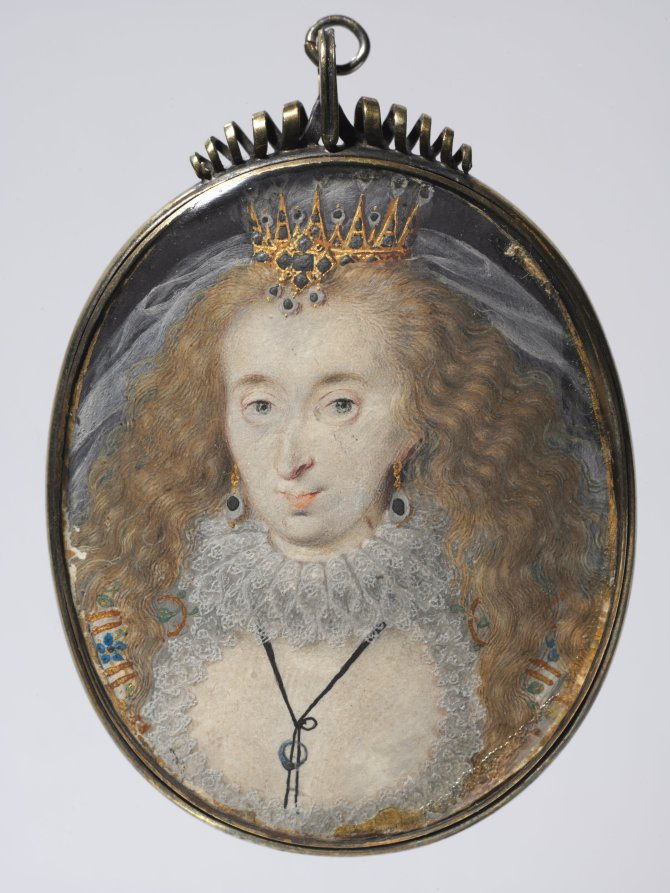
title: Portrait of Lucy Russell, Countess of Bedford, née Harrington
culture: England, early 17th century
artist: Isaac Oliver (French, c. 1565–1617)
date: c. 1608–1616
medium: watercolor on vellum with gold and silver in a 17th-century silver gilt frame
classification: Portrait Miniature